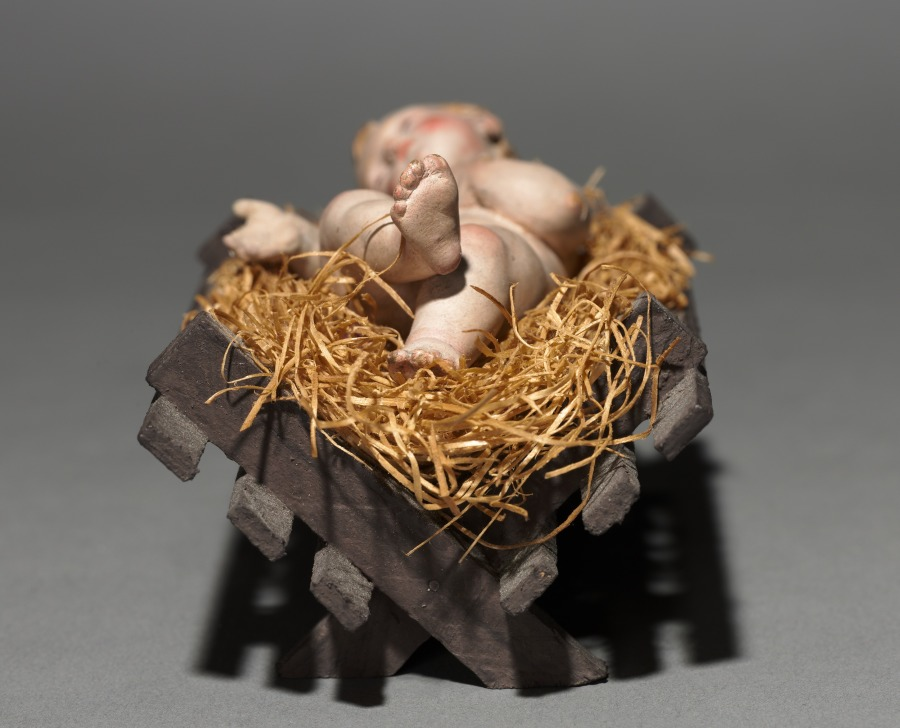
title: Figure from a Crèche: Infant Christ with Crib and Straw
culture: Italy, Naples, late 18th-early 19th century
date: 1780–1830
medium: painted terracotta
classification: Sculpture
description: The practice of creating scenes of the Nativity for the home dates from the early 1700s in Italy, where people began to set up doll-like figures of about a foot or less in height. The custom was particularly popular in Naples around 1800, where crèche scenes (crèche means cradle, or crib) included many figures, whose heads and hands of painted terracotta, stuffed cloth bodies, and clothing adapted from contemporary local costumes gave them an amazingly realistic character. Representations of the birth of Jesus can be traced to the first few centuries of Christianity. Both living creatures and sculptural depictions of them were used from early times. By the late middle ages it was customary to create life-size figures of wood or stone, naturalistically painted, to represent the characters who participated in the events of Jesus's early life. These sculptures were then arranged in scenes illustrating one or both of the most important of these events, the Adoration of the Shepherds and the Adoration of the Magi-the three kings from the East who came to pay homage to the Christ child. Used in churches, these large figures were especially popular in Italy, Central Europe, Spain, and Portugal. This Object in Focus presentation was organized by Henry Hawley, Curator of Renaissance and Later Decorative Arts and Sculpture.